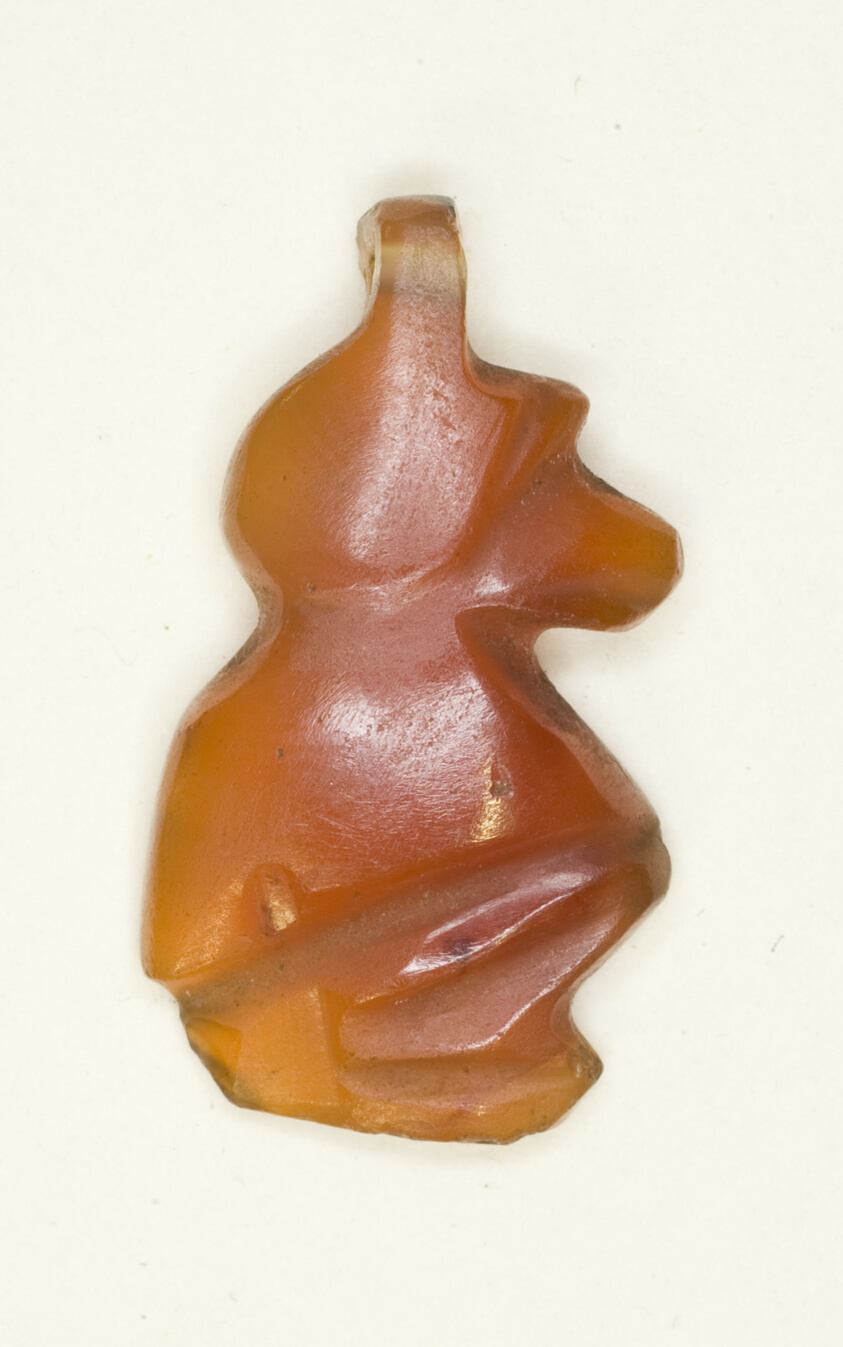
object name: Costume and Accessories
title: Amulet of a Sitting Baboon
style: middle kingdom, ancient, egyptian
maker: Egyptian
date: Middle Kingdom (about 1700 BCE)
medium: Carnelian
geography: Egypt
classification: amulet; jewelry; stone; ancient art; costume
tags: baboon, gods (deities), deities